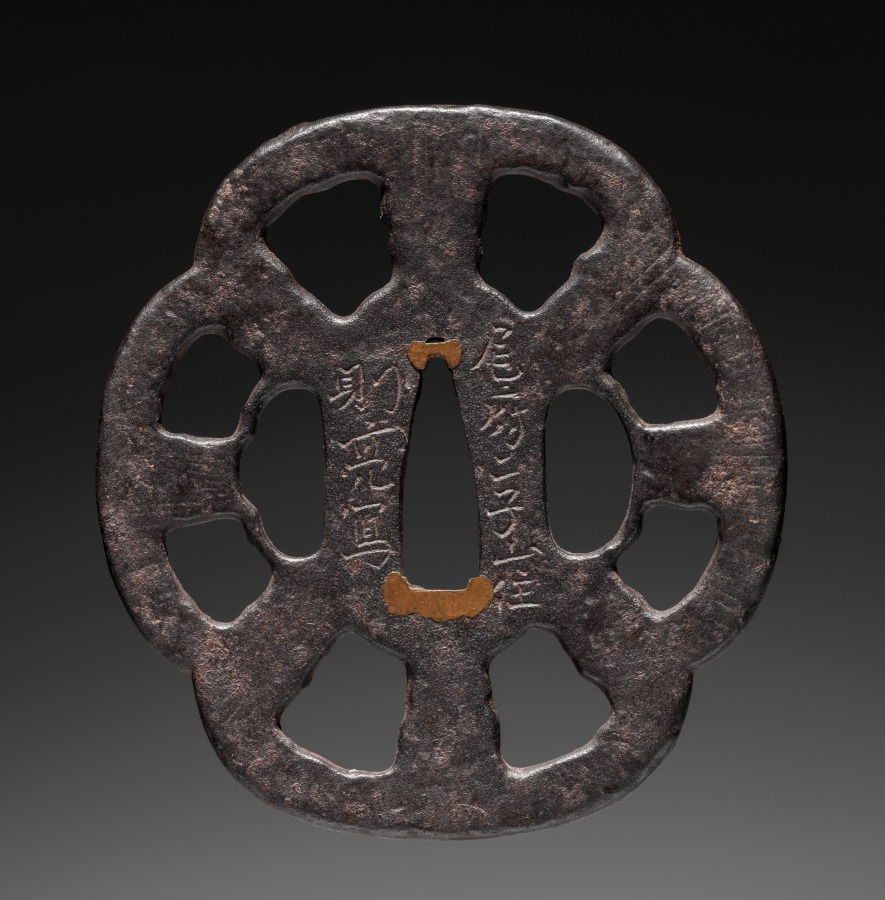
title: Sword Guard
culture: Japan, Edo period (1615–1868)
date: mid-1800s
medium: iron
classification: Arms and Armor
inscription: Signature: Norisuke, residing at Futago-yama, Bifu, copied